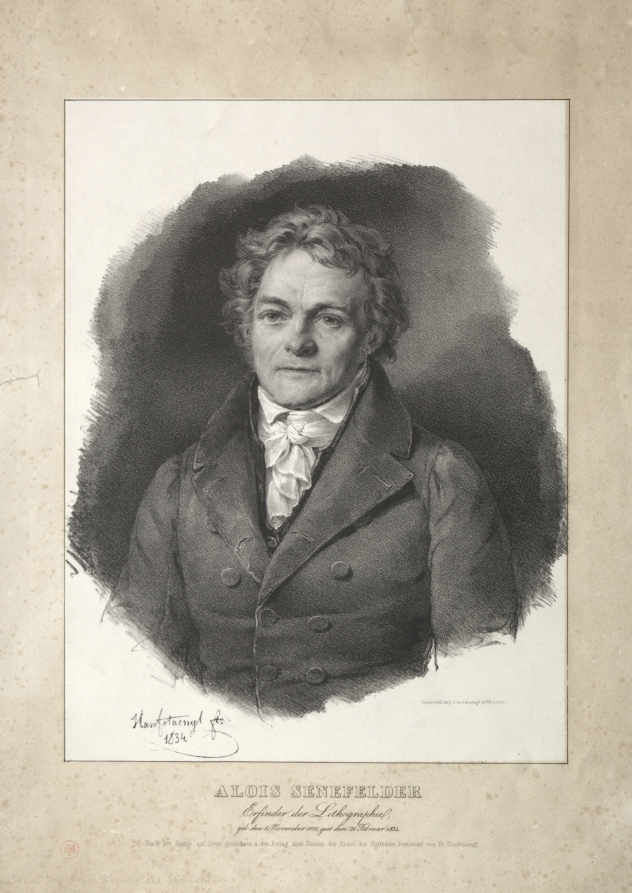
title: Aloys Senefelder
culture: Germany, 19th century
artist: Franz Seraph Hanfstaengl (German, 1804–1877)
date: 1834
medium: lithograph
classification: Print